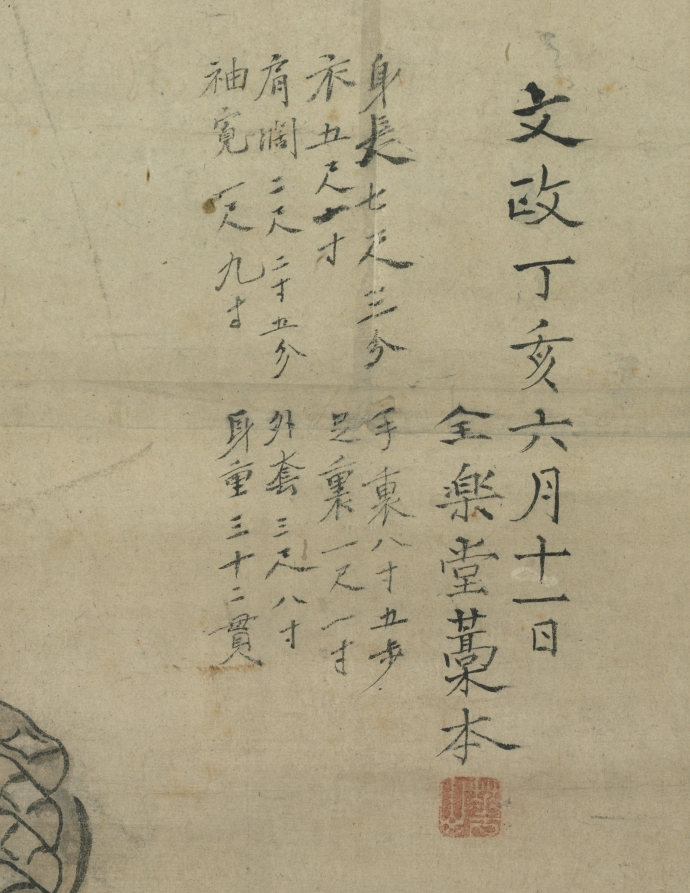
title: Portrait of Ōzora Buzaemon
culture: Japan, Edo period (1615–1868)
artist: Watanabe Kazan (Japanese, 1793–1841)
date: 1827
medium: hanging scroll; ink and color on paper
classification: Painting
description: Over seven feet tall, Ōzora Buzaemon became a tabloid sensation when he arrived in Edo (Tokyo) in 1827 . His handprints were cherished souvenirs, and his image was sold on woodblock prints. As inscriptions on the scroll detail, Watanabe Kazan met Buzaemon at the residence of a noted Confucian scholar. Using a camera obscura–type device—a tool that uses light to project an image onto a surface—he made this preliminary drawing for a painting. The portrayal depicts Buzaemon’s discomfort in being stared at.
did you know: Watanabe Kazan was interested in Rangaku (Dutch Learning).